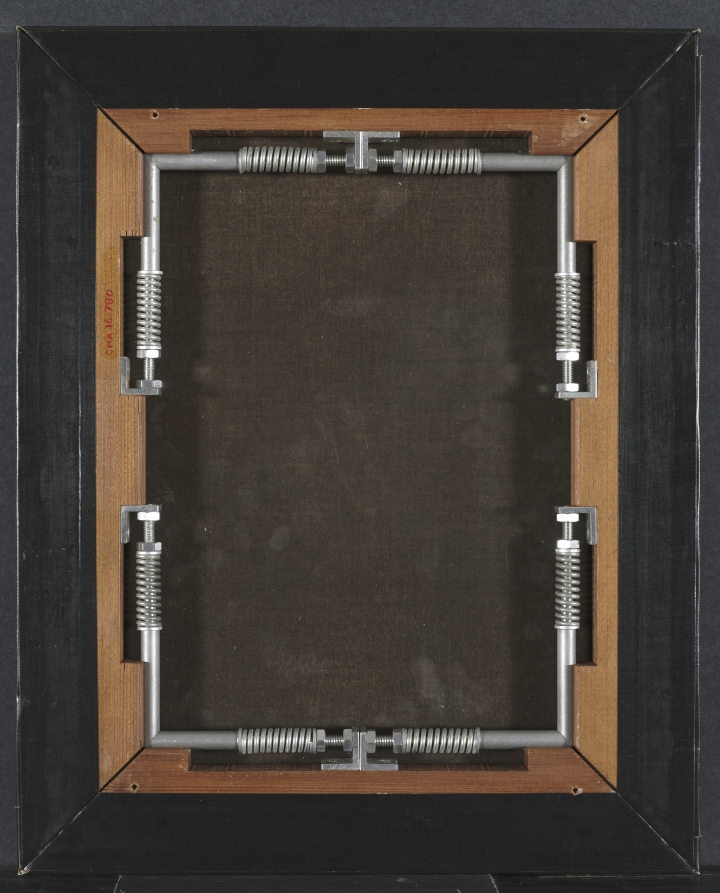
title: Sketch for a Ceiling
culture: Italy, 18th century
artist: Giovanni Battista Tiepolo (Italian, 1696–1770)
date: 1750s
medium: oil on canvas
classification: Painting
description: This small, quickly painted picture is typical of the sketches Tiepolo made as studies for larger compositions. When completed full-scale on a ceiling, works like these give the impression of a massive window, through which one can see angels or mythological beings floating among the clouds. Although we know from the work's shape that it was a study for a ceiling painting, it is not related to any of Tiepolo's finished architectural decorations. Tiepolo used such sketches to explore design problems, experiment with form and color, or give his clients an idea of how a finished project would look. With the help of a large workshop, which included two of his sons, Tiepolo completed a number of painted ceilings and decorative schemes across Europe.